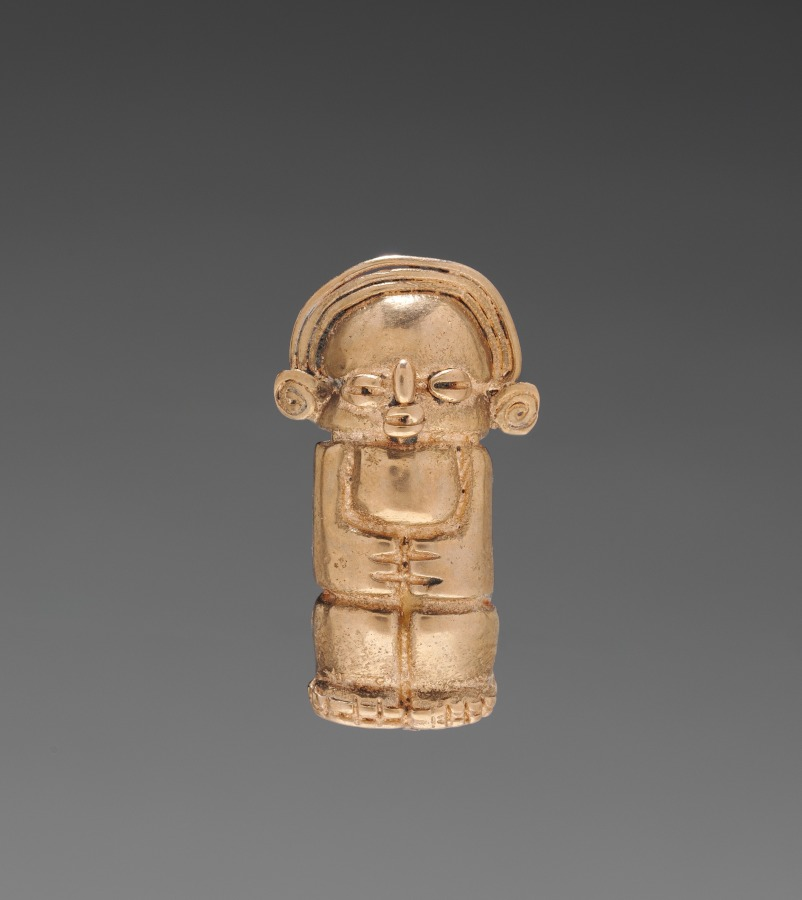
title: Necklace Figurine Beads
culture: Colombia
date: 1–700 CE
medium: cast gold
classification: Jewelry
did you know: Working with gold dates back to at least 500 BC in Ecuador and Colombia.